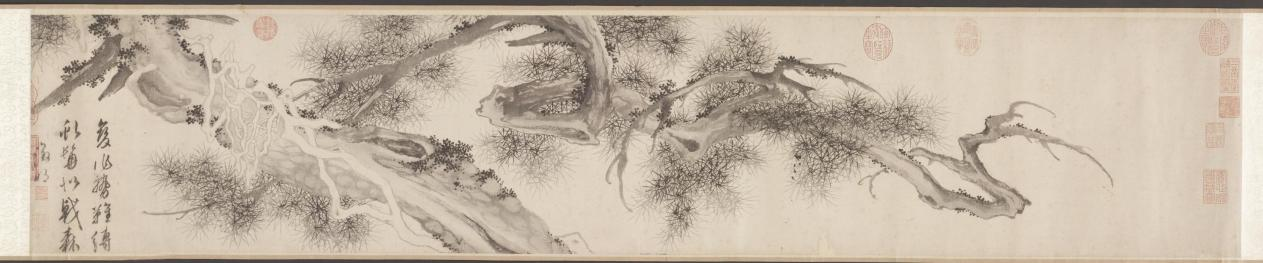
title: Old Pine Tree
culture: China, Ming dynasty (1368–1644)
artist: Wen Zhengming (Chinese, 1470–1559)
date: late 1530s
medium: handscroll; ink on paper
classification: Painting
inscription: 變化勢難縛，虬髯似戟森. 徵明 [印]文徵明印; 衡山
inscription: 2 partial seals of Qian Shisheng 錢士昇 (1575–1652)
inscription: 8 imperial seals: 6 of the Qianlong emperor (r. 1736–95); 1 of the Jiaqing emperor (r. 1796–1821); 1 of the Xuantong emperor (r. 1909–11).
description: Here the natural appearance of a gnarled and vine-entangled pine has been transformed into a rhythmic abstraction of brushstrokes and ink tonalities, with unifying opposites—opening and closing, rising and falling—that provide the design across the horizontal scroll. The artist's inscription reads: "The force of change beyond restraint; / The dragon's whiskers are likened to a forest of spears."